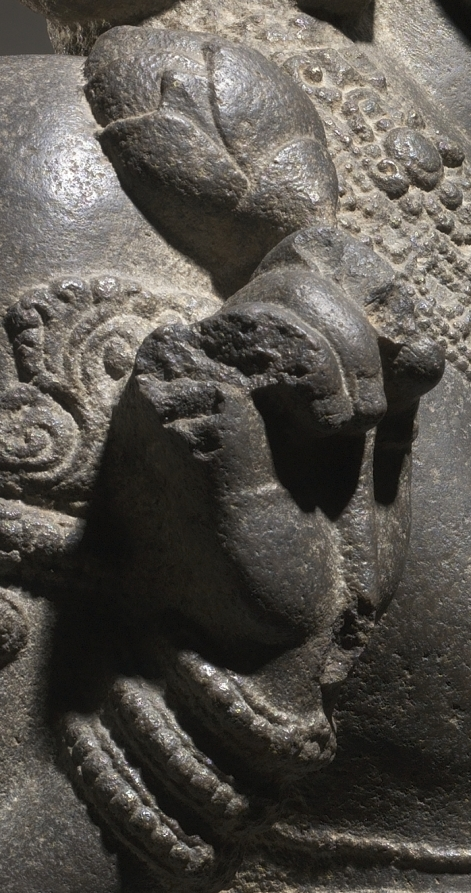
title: Brahma-Shiva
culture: South India, Tamil Nadu, Chola dynasty, late 10th - early 11th century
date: late 900s–1000s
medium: granite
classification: Sculpture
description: In the Hindu pantheon Brahma is in charge of carrying out the work of creation. In this tour-de-force of South Indian temple sculpture, he is in a special regal aspect, with the only elements of his typical priestly appearance being the prayer beads and the matted dreadlocks piled on his head. Four arms connote superhuman power, and four heads convey the idea that his creative activities spread in all four directions. His upper right hand enjoins freedom from fear, and the lower holds a lotus bud associated with birth and the process of creation. His lowered left hand is held in the gift-giving gesture, suggestive of the gift of creation he will bestow upon the world.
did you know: The back of the sculpture retains the original textured surface from a pointed chisel, suggesting it was in a niche or near a wall, protected from worshippers’ touches.